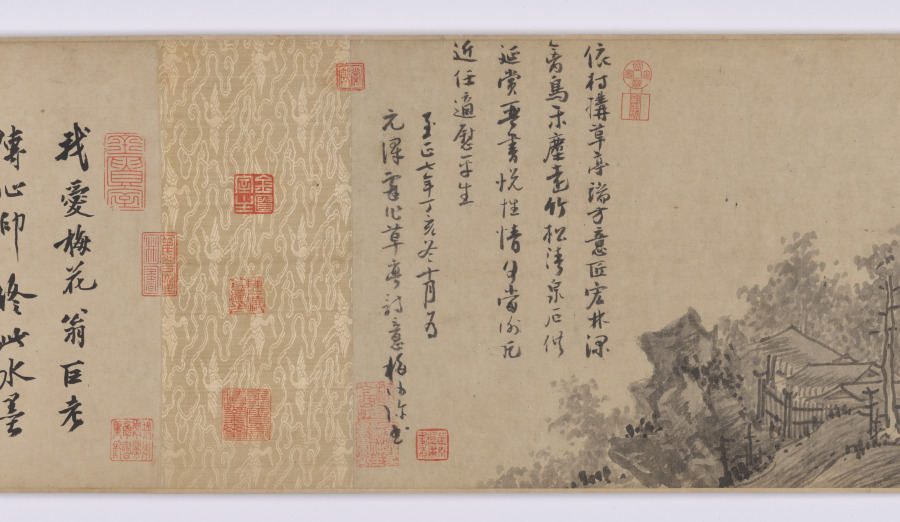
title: Poetic Feeling in a Thatched Pavilion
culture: China, Yuan dynasty (1271-1368)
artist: Wu Zhen (Chinese, 1280–1354)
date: 1347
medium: handscroll; ink on paper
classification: Painting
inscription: 依村構草亭，端方意匠宏。 林深禽鳥樂，塵遠竹松輕。 泉石俱延賞，琴書悅性情。 何當謝凡近，任適慰平生。 至正七年丁亥冬十月，為元澤戲作草亭詩意。梅沙彌書 [印]楳華盦; 嘉興吳鎮仲圭書畫記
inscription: 我愛梅花翁，巨老傳心印。 脩此水墨缘，種種得蒼潤。 樹石墮筆鋒，造化不能吝。 而今橡林下，我願執掃汛。 後學沈周 [印]启南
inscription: Colophon by Chen Rentao (1952): 予求梅道人畫二十年不可得。所見多膺鼎，即故宮所藏山水數軸都不可靠。傳世真迹，惟《漁父圖》、《嘉禾八景》與此《草亭詩意》而已。壬辰十月十四日余大病初愈，居家休養，研山師忽持此圖相贈。展卷披覽，頓覺精神沛振，如服僊藥。同日又得宋拓柳公權《神策軍紀聖德碑》，及群玉堂藏《真草書千(字)文》，皆海內孤本。一日得數寶，欣喜何如，書以志幸。 陳仁濤識 [印]陳氏仁濤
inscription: Colophon by Chen Rentao: 此圖作於至正七年丁亥，時年六十八，盖其晚年神品也。 濤又識 [印]陳仁濤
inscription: Title on frontispiece by Li Dongyang 李東陽 (1447-1516).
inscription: 33 additional seals: 1 seal of Li Chao-heng 李肇亨 (1592-1664)：檇李李肇亨書畫記; 9 seals of Liang Qingbiao 梁清標 (1620-1691): 蒼巖子、蕉林、蕉林梁氏書畫之印、蕉林秘玩、蕉林書屋、蕉林玉立氏圖書、棠邨 (appears twice)、棠邨審定; 1 seal of Wang Yirong (1845-1900): 懿榮; 3 seal of Li Yanshan (1898-1961): 雙銕笛樓 (appears twice)、硯山心賞; 12 seals of Chen Rentao 陳仁濤（1906-1968）：陳氏仁濤、陳仁濤珍藏印、金匱寶藏·陳氏仁濤 (appears three times)、金匱秘笈、金匱室、金匱室精鑒璽 (appears twice)、金匱室主、金匱神品、仁濤奇緣; 1 seal: 崐溟居士; 1 seal: 林止在㭯生圖書印; 3 seals unidentified.